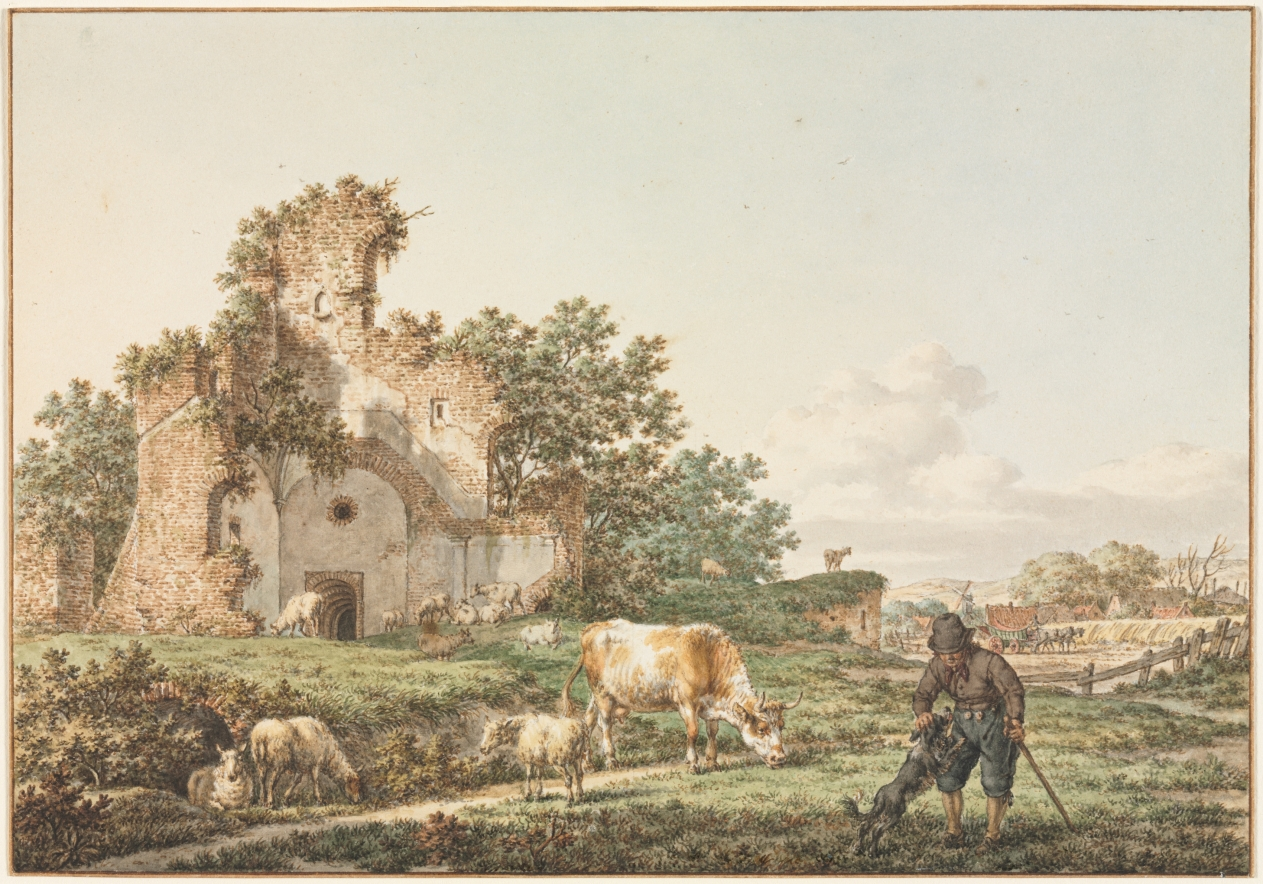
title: Pastoral Landscape with a Ruin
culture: Netherlands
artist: Jacob Cats (Dutch, 1741–1799)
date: 1799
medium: watercolor, point of brush and watercolor, and pen and brown ink over black chalk; framing lines in brown ink and brown wash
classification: Drawing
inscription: VERSO, through transmitted light, signed(?), lower left, in ink: J. Cats [inv et fecit?] / 1799 ; upper center, in ink(?): 32 37 1/2 ; center, in ink(?): N° 65 ; VERSO OF SECONDARY SUPPORT, lower left, in graphite: J. Cats inv et fecit [erased] / 1799 (erased)